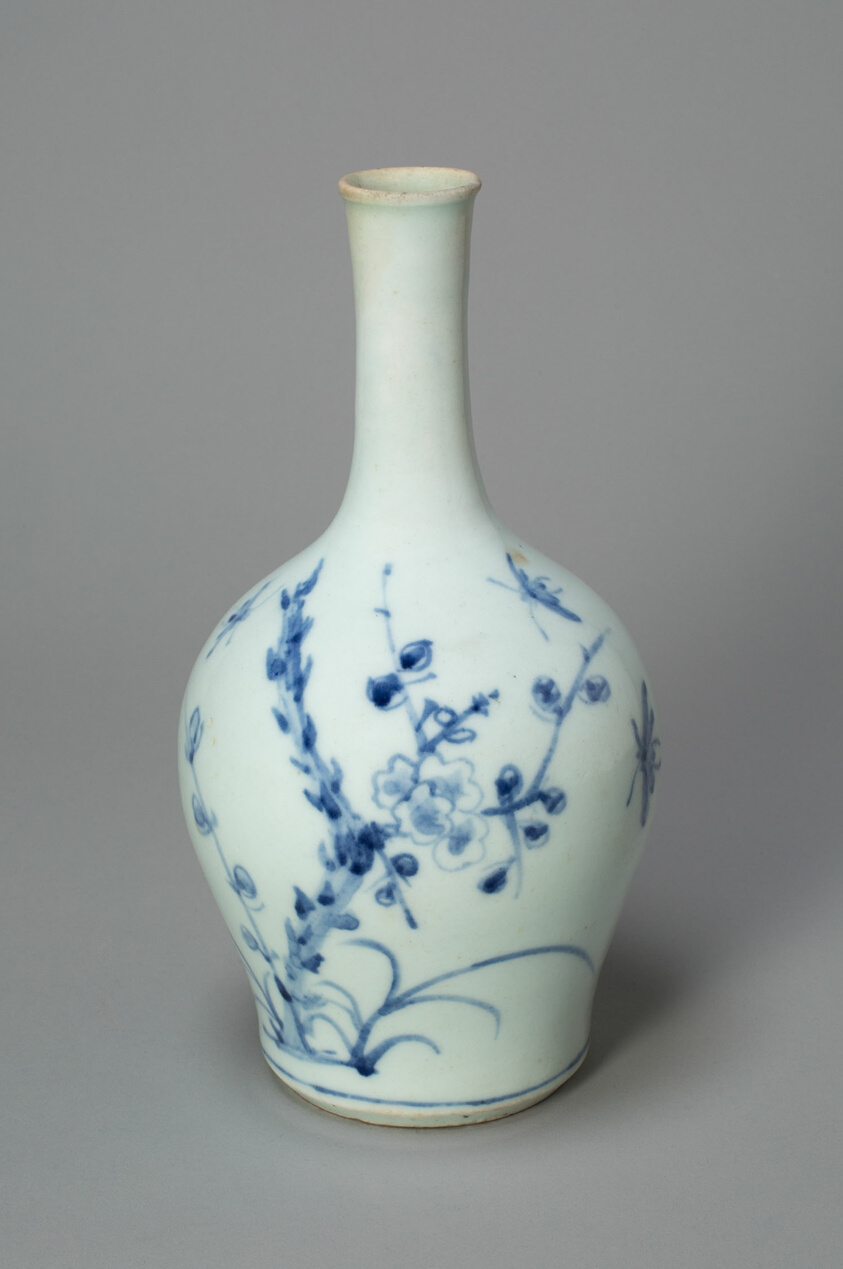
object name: Vessel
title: Bottle with Bamboo and Plum Motifs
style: Korean (culture or style)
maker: Korea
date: Joseon dynasty (1392–1897), 19th century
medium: Porcelain with blue underglaze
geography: Korea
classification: vase; vessel; asian art; ceramics